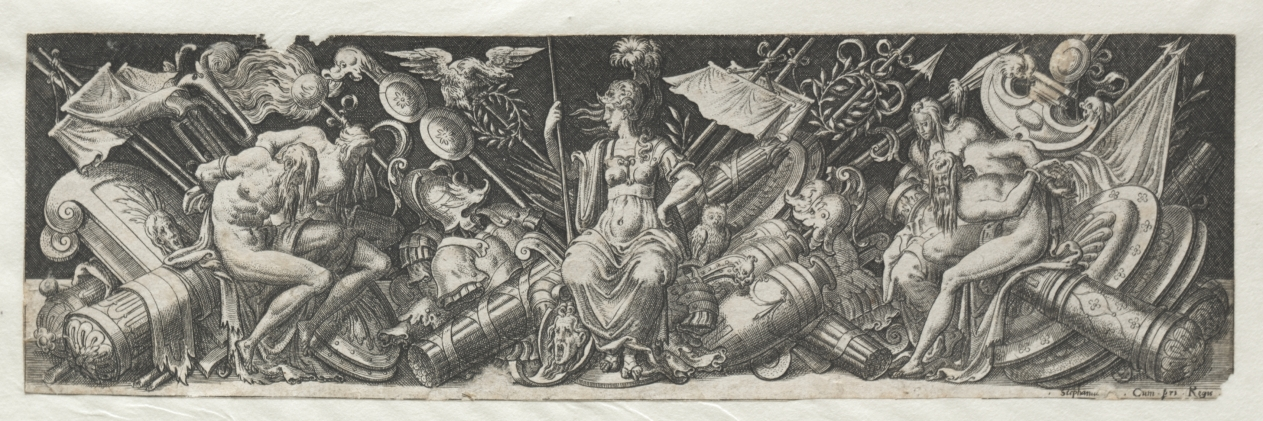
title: Combats and Triumphs No. 1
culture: France, 16th century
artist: Etienne Delaune (French, 1518/19-c. 1583)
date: c. 1550–72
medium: engraving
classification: Print